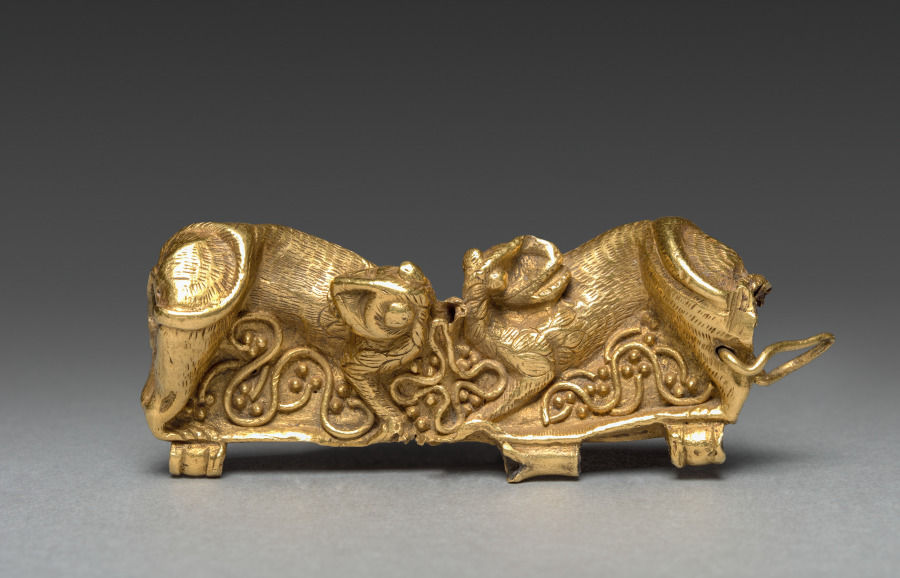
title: Repoussé Gold Clasp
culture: Europe, 13th century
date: 1200s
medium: repousé gold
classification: Jewelry